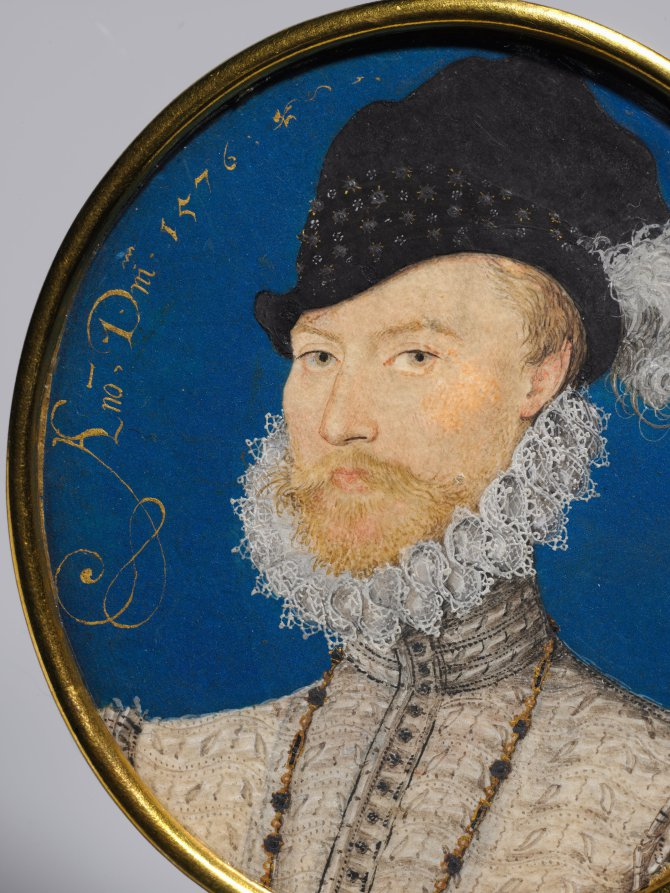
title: Portrait of Charles Howard, 2nd Baron Howard of Effingham, later 1st Earl of Nottingham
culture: England, 16th century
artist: Nicholas Hilliard (English, c. 1547–1619)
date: 1576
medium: watercolor on vellum in a gilt metal frame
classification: Portrait Miniature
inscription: inscribed from left: Ano, Dm. 1576: / AEtatis Suae; 39.